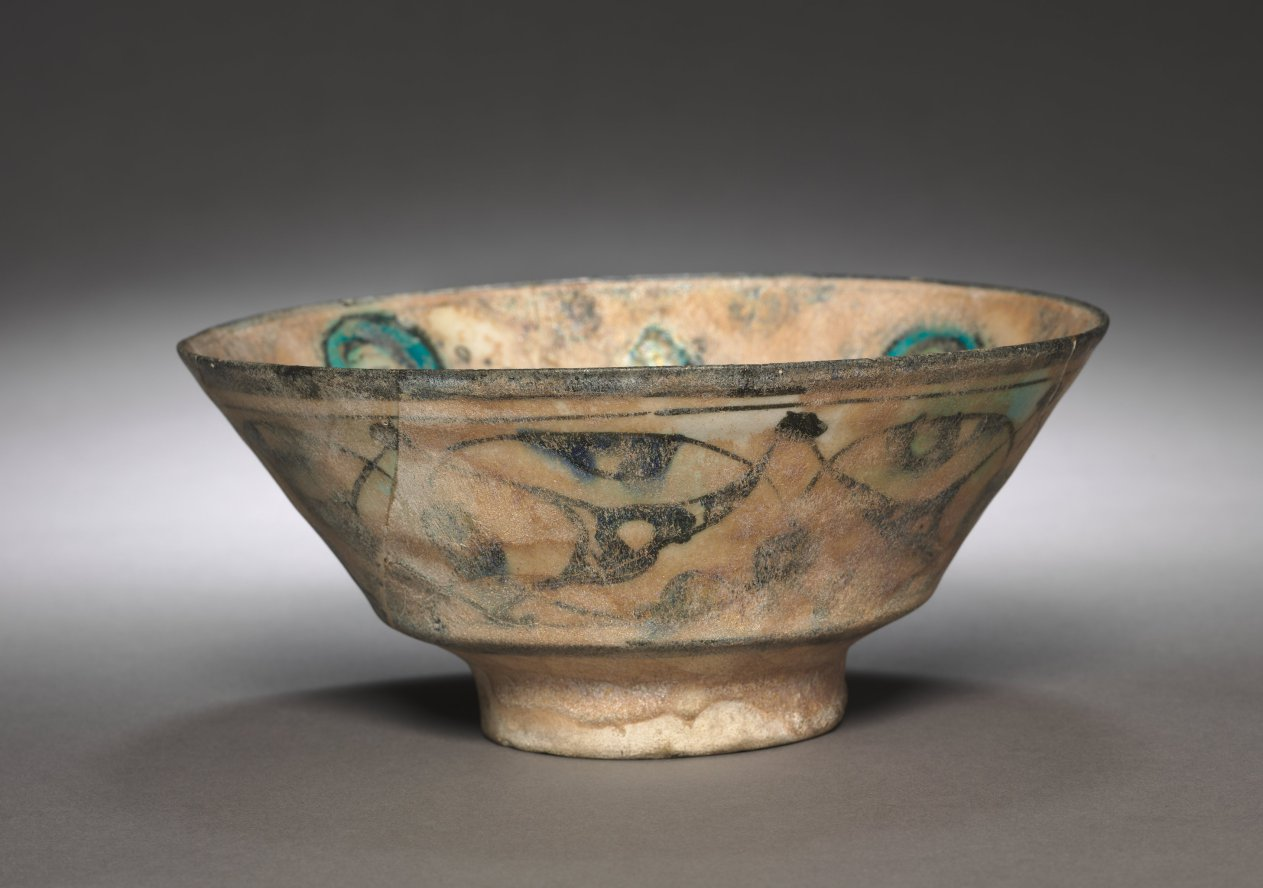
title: Bowl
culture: Iran, Kashan, Seljuq period of Iran (1037–1194)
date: mid-1200s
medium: fritware with overglaze-painted design (minai ware)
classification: Ceramic